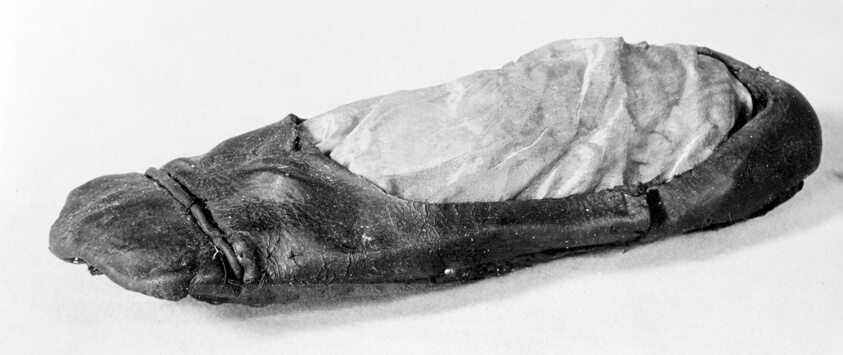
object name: Textile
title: Shoe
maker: England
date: 16th century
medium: Leather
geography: England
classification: textile; costume accessory - shoe; shoes - misc; costume; dress (garment); clothing